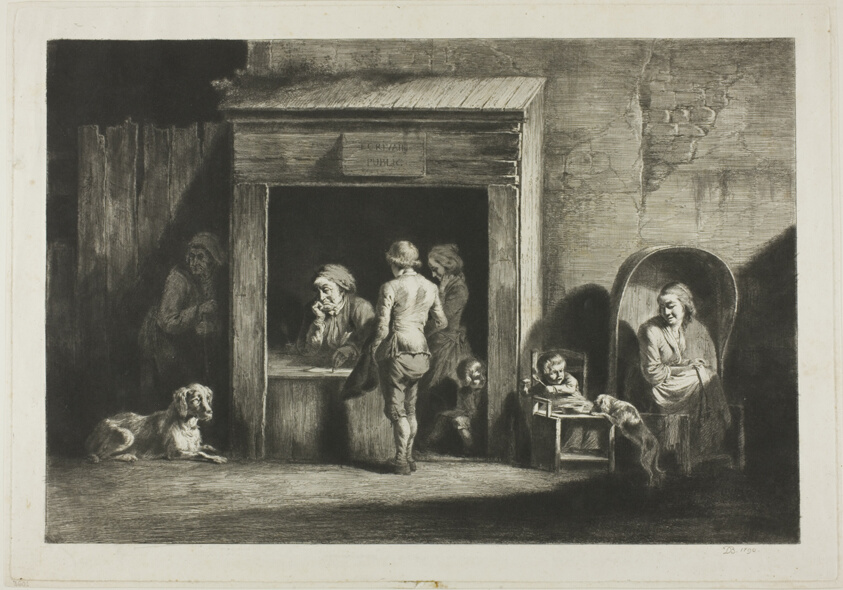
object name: Print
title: The Public Scribe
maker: Jean Jacques de Boissieu (French, 1736-1810); after Jacob van Ruisdael (Dutch, 1628/29-1682)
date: 1790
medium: Etching, drypoint, and roulette on ivory wove paper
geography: France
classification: etching; print; prints and drawing